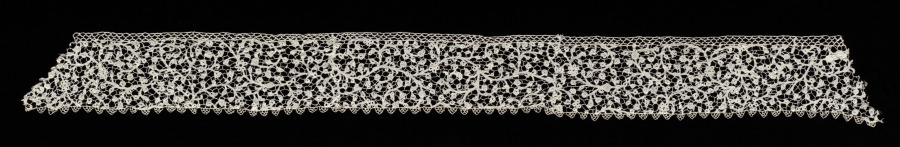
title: Lace Border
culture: Italy, Milan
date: 1600s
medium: Linen: bobbin lace (bride ground)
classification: Lace